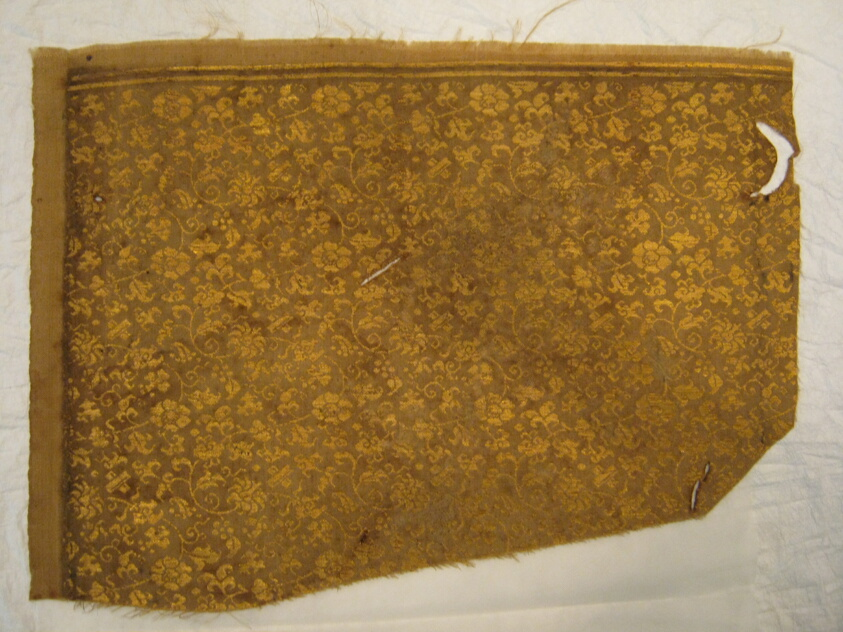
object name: Textile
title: Fragment (from Obi)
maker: Japan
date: 18th century, late Edo period (1789–1868)/ Meiji period (1868–1912)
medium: Plain compound twill, silk and gilt paper; 3 strips to m.m.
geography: Japan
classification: textile; weaving; obi (sash)